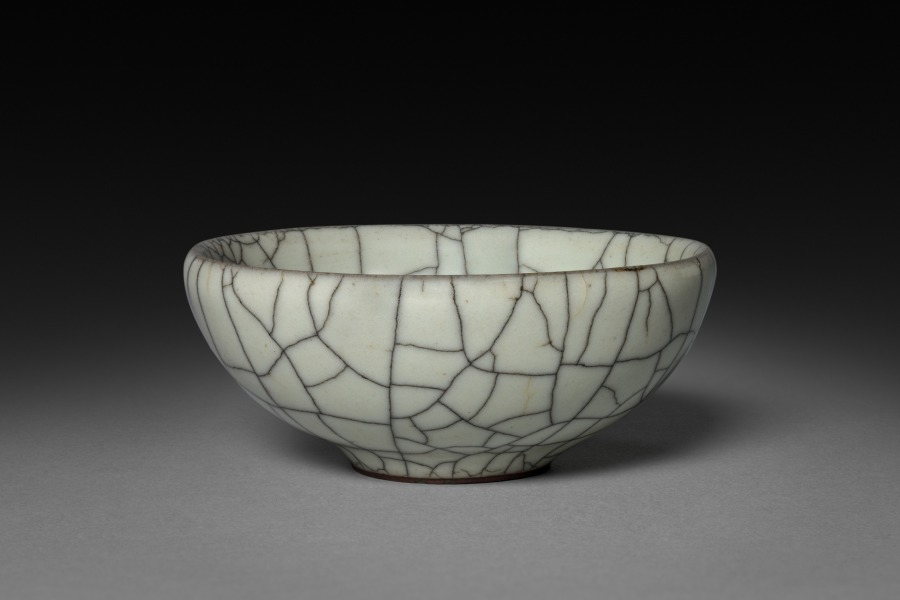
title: Wine Cup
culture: China, Song dynasty (960-1279)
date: 960–1279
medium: Glazed dark brown stoneware, Guan ware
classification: Ceramic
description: Wine was often served hot in porcelain cups that could also be used in popular drinking games.